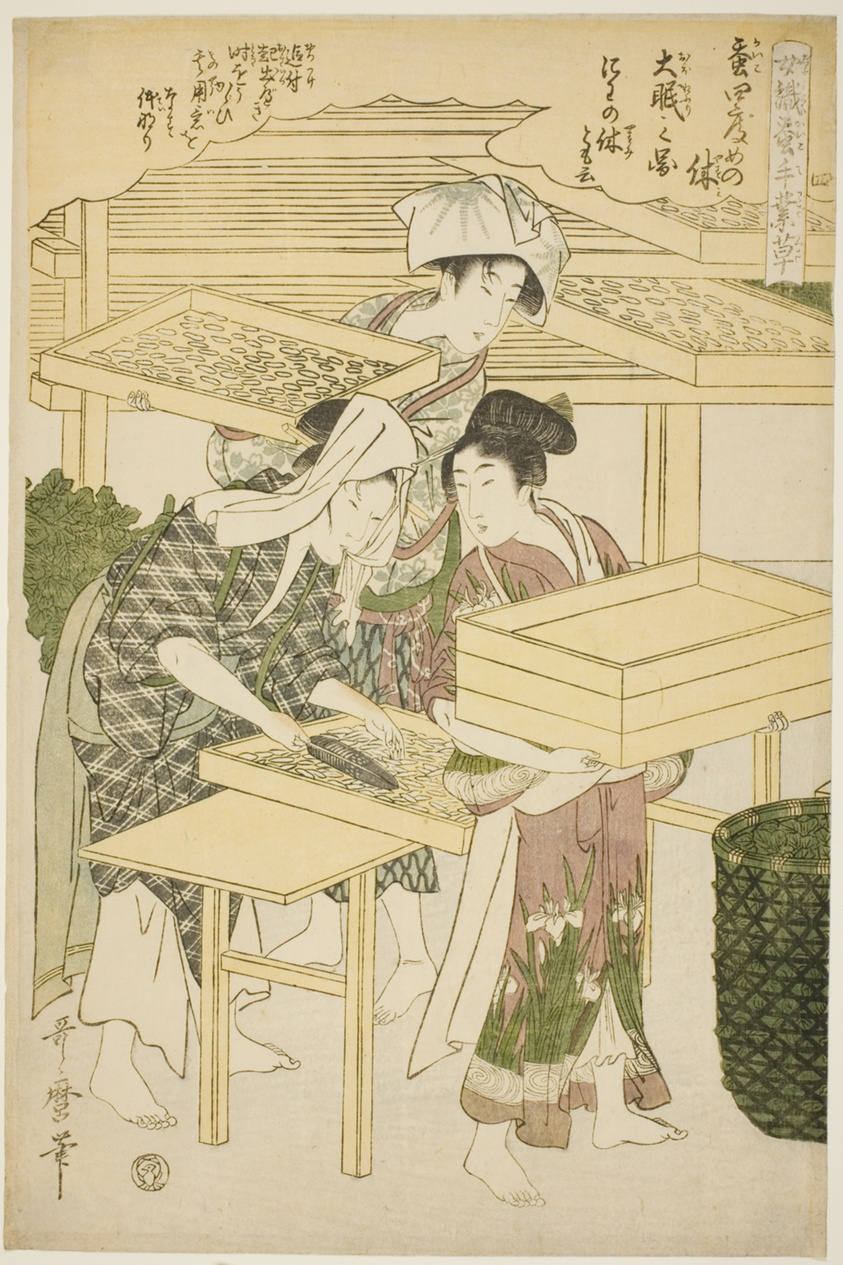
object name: Print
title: No. 4 (shi), from the series "Women Engaged in the Sericulture Industry (Joshoku kaiko tewaza-gusa)"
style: Japanese (culture or style)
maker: Kitagawa Utamaro 喜多川 歌麿; Japanese, 1753 (?)-1806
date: c. 1798/1800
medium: Color woodblock print; oban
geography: Japan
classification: woodblock print; print; asian art